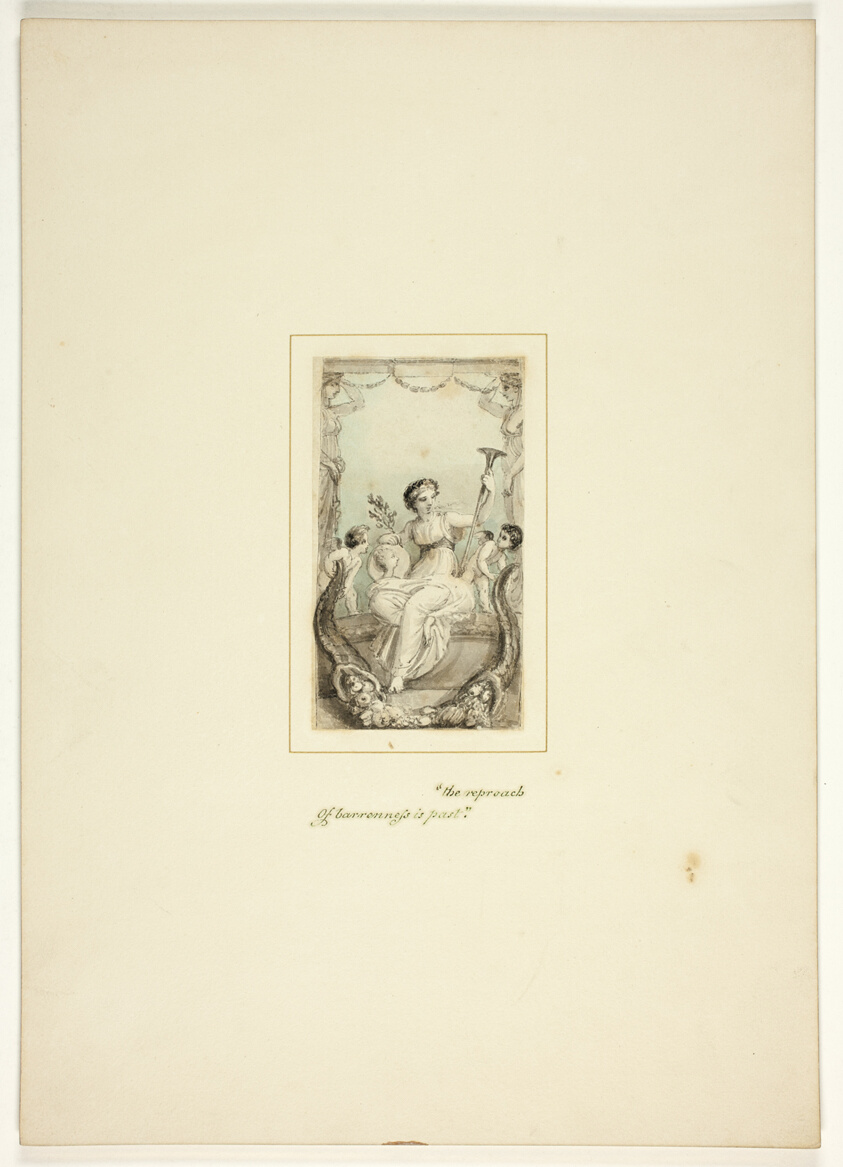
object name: Drawing and Watercolor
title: Study for a plate from The Task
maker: Thomas Stothard (English, 1755-1834)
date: c. 1800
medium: Ink wash on paper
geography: England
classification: ink or chalk wash; drawings (visual works); prints and drawing